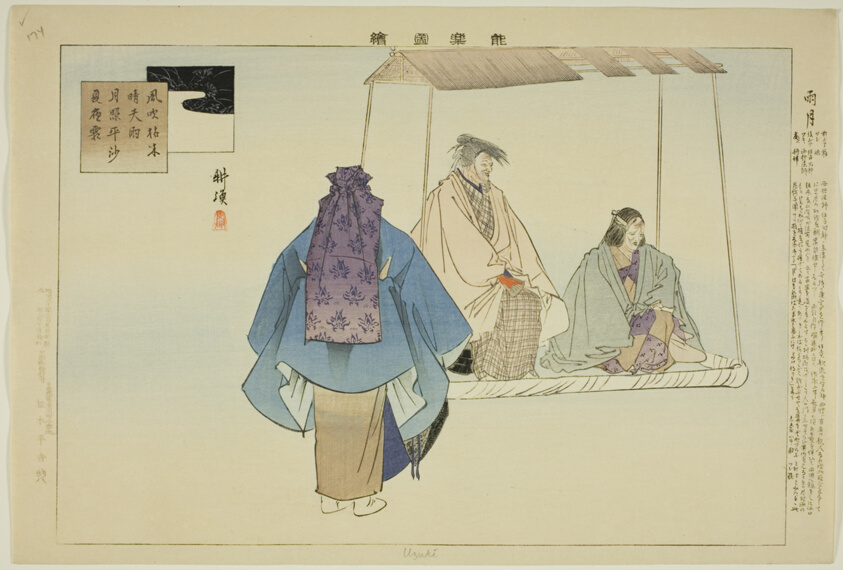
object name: Print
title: Uzuki, from the series "Pictures of No Performances (Nogaku Zue)"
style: Japanese (culture or style)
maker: Tsukioka Kogyo; Japanese, 1869-1927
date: 1898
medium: Color woodblock print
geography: Japan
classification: woodblock print; print; asian art